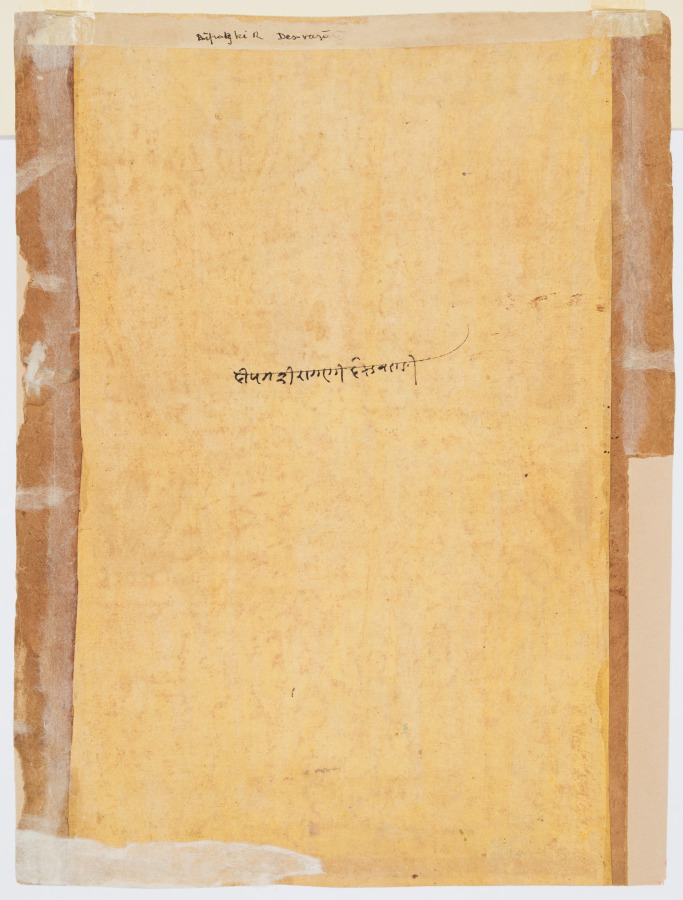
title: A Royal Woman in a Pavilion: Desavarari Ragini of Dipak, from a Ragamala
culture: Northwestern India, Rajasthan, Rajput Kingdom of Mewar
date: c. 1695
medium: gum tempera, ink, silver, and gold on paper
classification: Painting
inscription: dīpaka dī raganī desabarārī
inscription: Dipak ki R Desavarari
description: A sumptuous palace setting depicts the women’s quarters. In the upper register a woman approaches a bed made under a canopy on a terrace overlooking a lotus pool in the middle of which is a pleasure pavilion. An attendant holds a peacock tail feather whisk to indicate the royal status of the woman in the center; two musicians play drum and cymbals in the lower right.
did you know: “Dipak” means lamp; one attendant holds a lamp; another is on a golden stand.